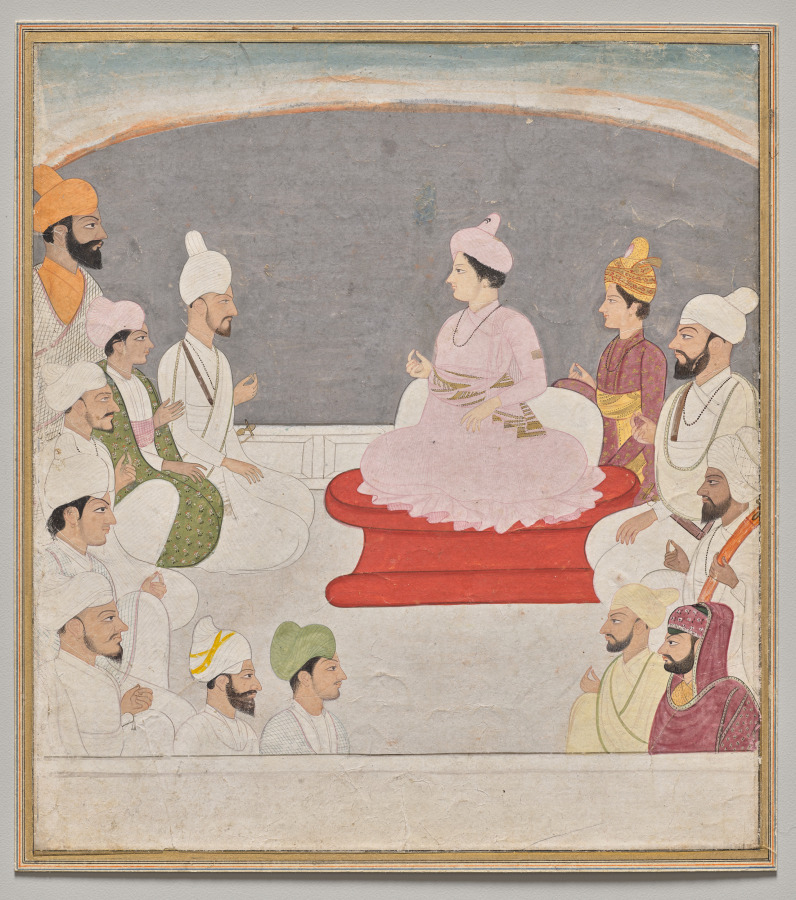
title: Raja Sansar Chand of Kangra and courtiers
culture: Northern India, Pahari kingdoms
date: c. 1783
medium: gum tempera and gold on paper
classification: Painting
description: Ruler of the western Himalayan kingdom of Kangra from 1775 to 1823, Sansar Chand (1765–1823) is seated on a red dais. As a youth at around 18 years of age, he still has not grown a beard, and his distinctive curly bushy hair is visible beneath his pink turban. This portrait may commemorate the Mughals relinquishing control of Kangra in 1783.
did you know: This painting once belonged to Cleveland attorney George P. Bickford, who endowed positions at the CMA and Harvard.